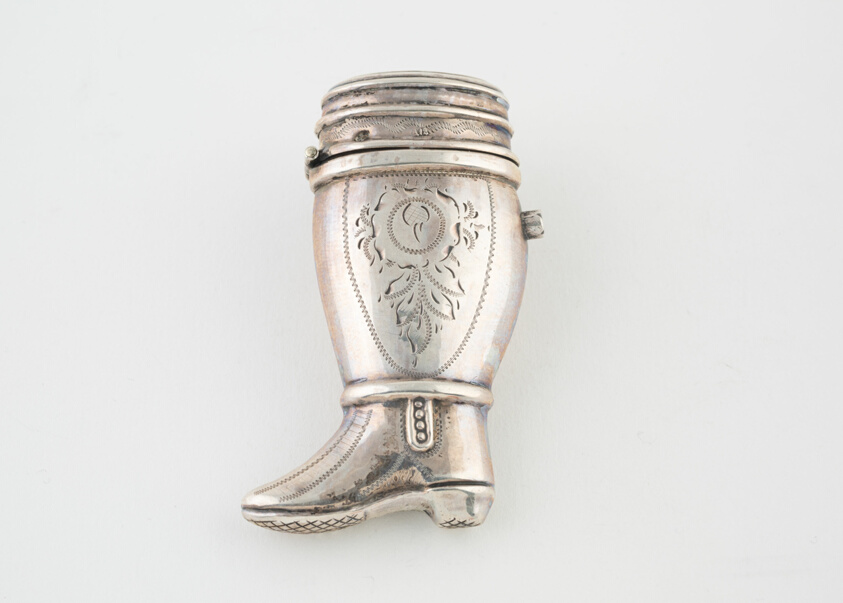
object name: Metalwork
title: Match Safe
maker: Possibly Denmark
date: c. 1850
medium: Silver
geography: Denmark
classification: container for personal use; box; european decorative arts; metalwork; silver; decorative object/ornament